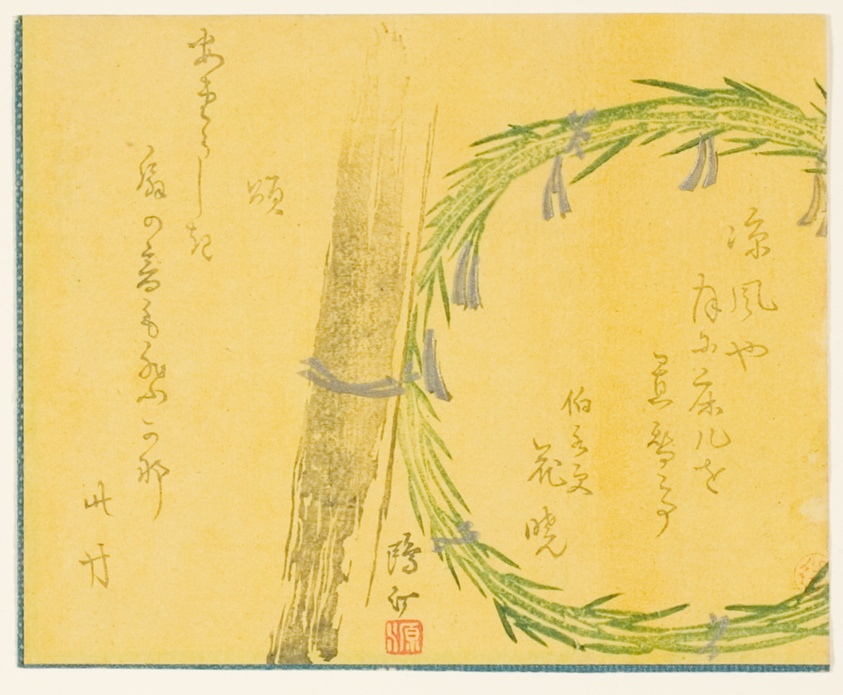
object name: Print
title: Bamboo and Wreath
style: Japanese (culture or style)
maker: Maezawa Otei (Japanese, 1827-?)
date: 1850s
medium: Color woodblock print; surimono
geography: Japan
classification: woodblock print; print; asian art